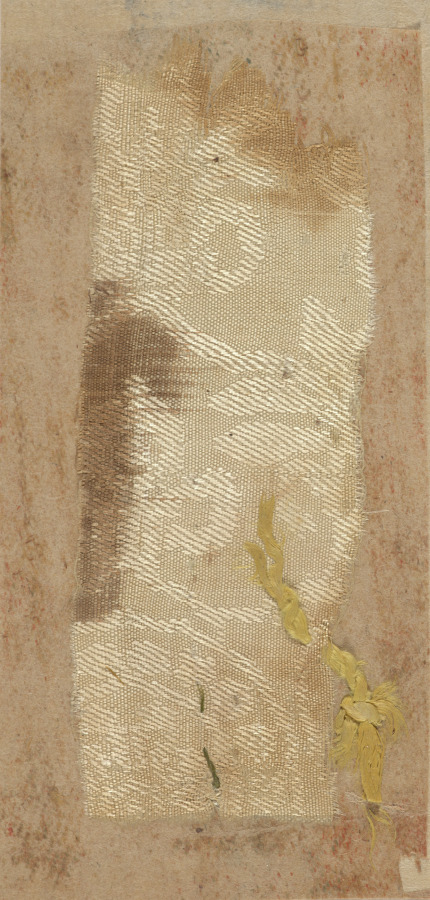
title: Fragment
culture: China, 8th century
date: 700s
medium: tabby ground and twill pattern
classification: Textile